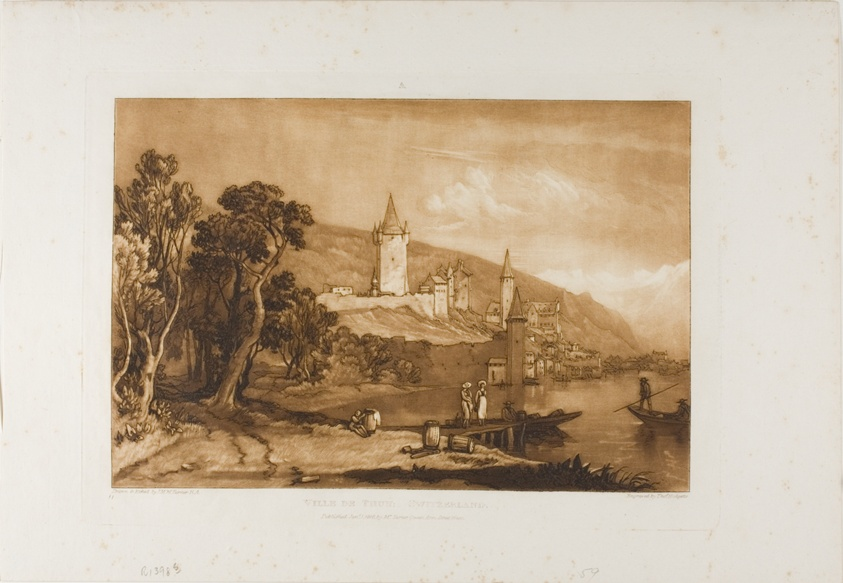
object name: Print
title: Ville de Thun, plate 59 from Liber Studiorum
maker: Joseph Mallord William Turner (English, 1775-1851); Engraved by Tho. Hodgetts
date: published January 1, 1816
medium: Etching and engraving in brown on ivory laid paper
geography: England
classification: etching; print; prints and drawing